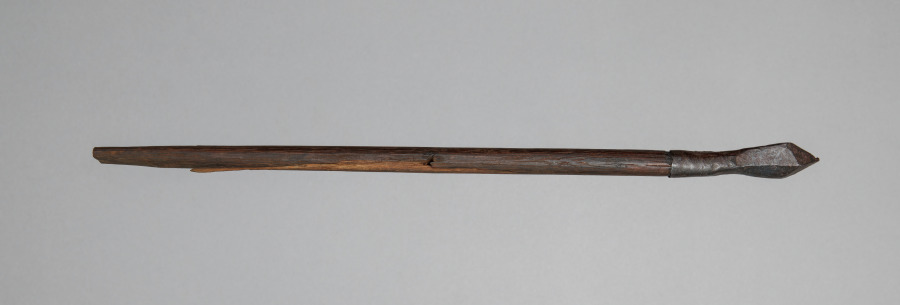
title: Crossbow Bolt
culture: Germany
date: 1500s-1600s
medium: wood, leather, steel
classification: Arms and Armor